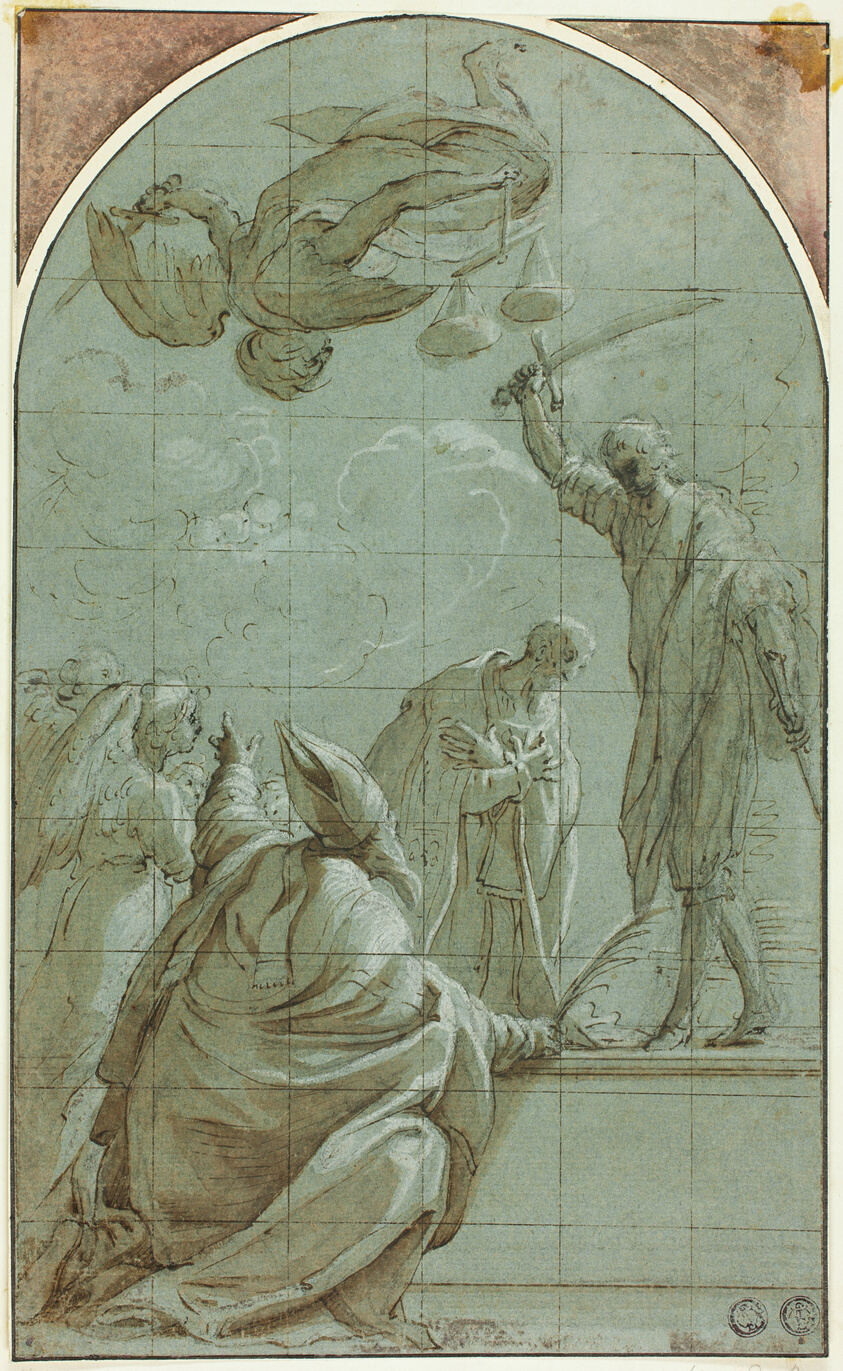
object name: Drawing and Watercolor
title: Martyrdom of a Saint Interrupted by Justice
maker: Pupil of Charles Joseph Natoire (French, 1700-1777); or possibly Unknown Venetian Artist (Italian, 18th century)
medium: Pen and brown ink, with brush and brown wash, heightened with lead white (partly discolored), over black chalk, squared in brown ink, on blue laid paper, laid down on tan laid paper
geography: Italy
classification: drawings (visual works); prints and drawing